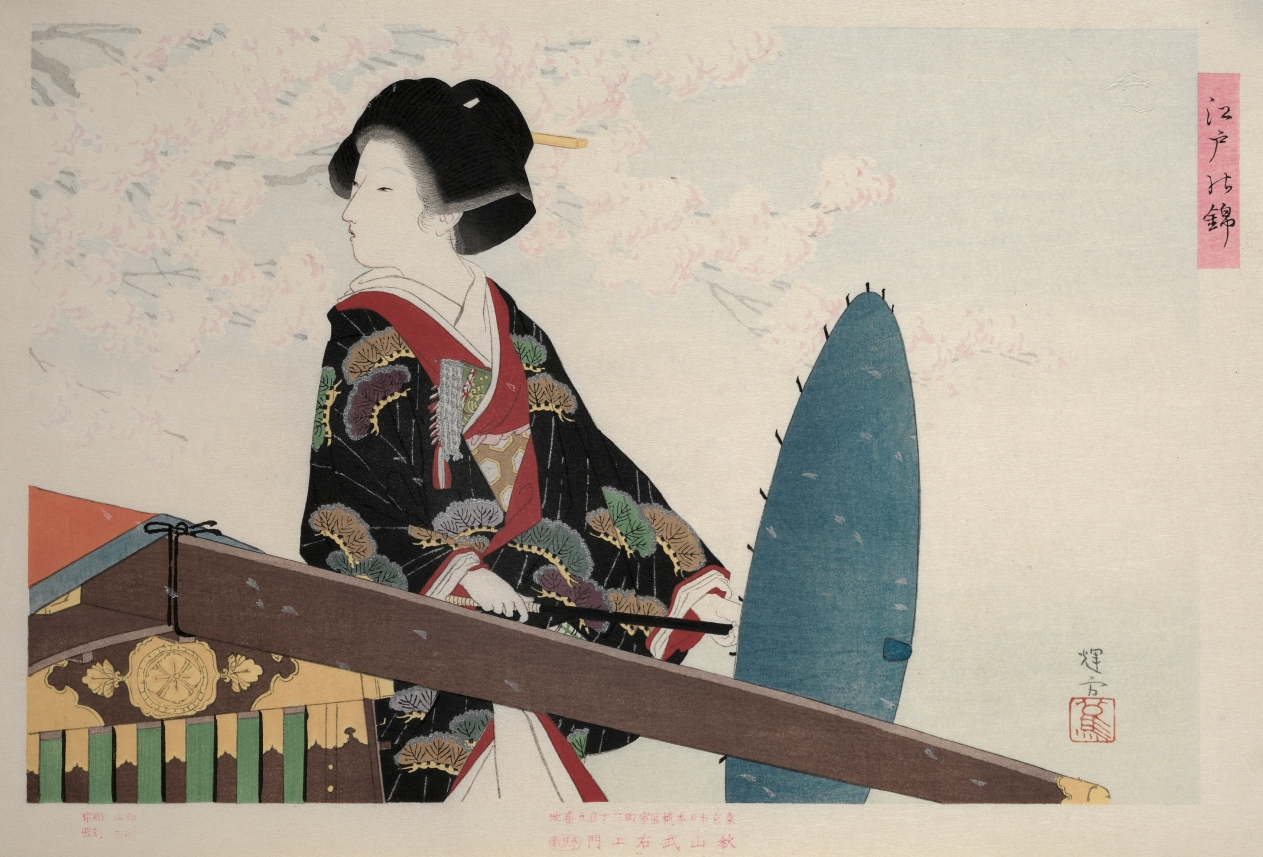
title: Cherry Blossoms, from the series Brocades of Edo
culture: Japan, Meiji period (1868–1912)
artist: Ikeda Terukata (Japanese, 1883–1921)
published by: Akiyama Buemon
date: 1903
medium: Woodblock print, ink and color on paper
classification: Print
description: In this print, a fashionably dressed woman holds out a parasol as she gazes at cherry blossoms. She stands close to her palanquin, which is decorated with elaborate metal fittings. Along with his wife, Ikeda Shoen (1888–1917), Ikeda Terukata trained with print artist Mizuno Toshikata (1866–1908) and focused on designs of beautiful women. He exhibited and won prizes in both the annual Ministry of Education Exhibition (Bunten) and Japan Art Institute Exhibition (Inten).